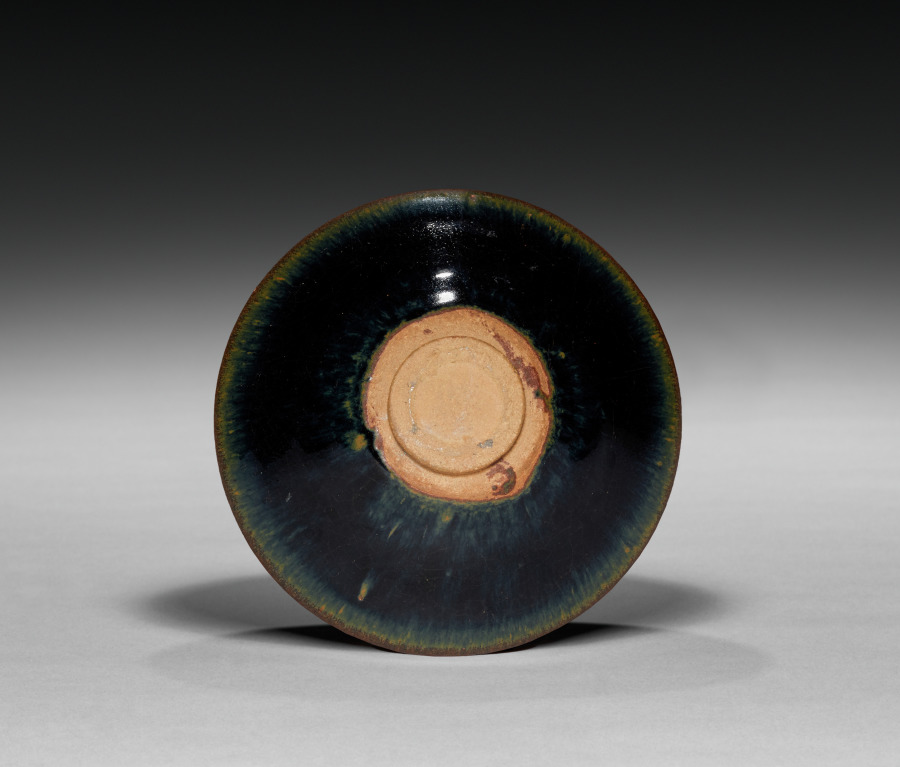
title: Black Glazed Teabowl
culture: China, Fujian province, Southern Song dynasty (1127-1279)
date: 1100s–1200s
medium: Stoneware with opaque dark brown glaze, Jian ware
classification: Ceramic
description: This teabowl exhibits a shiny almost mirror-black, thick glaze that runs down from the mouth showing fine, bluish-brown streaks around the rim. The Northern Song dynasty emperor Huizong (徽宗, reigned 1100–1126) once referred to the markings as “hare’s fur.” The emperor also remarked that Jian bowls should be deep and wide to allow tea powder to be whisked sufficiently in the bowl. The contrast between the tea’s white foam and the dark glaze was appreciated by connoisseurs. The thick walls and conical shape of the bowls were ideal for keeping tea hot and frothy.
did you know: Jian ware was made in Fujian province, first in kilns at Jian’an and later at Jianyang.